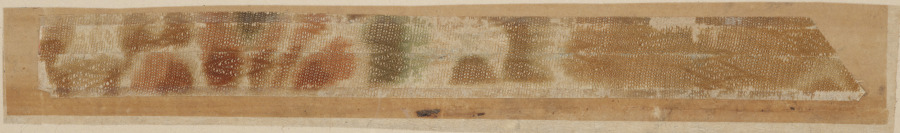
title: Fragment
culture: China or Japan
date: 700s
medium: gauze ground, resist dyed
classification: Textile